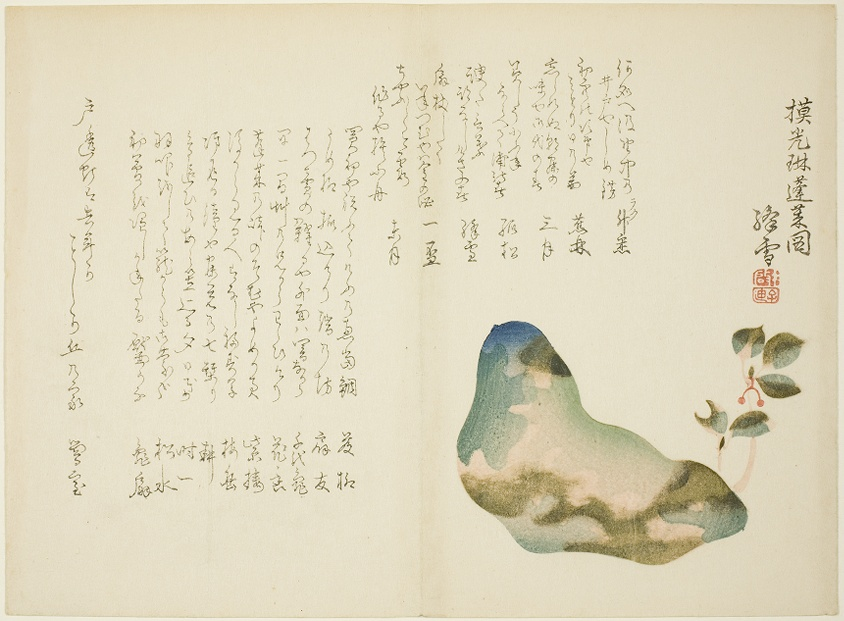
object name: Print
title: Mount Horai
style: Japanese (culture or style)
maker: Kosetsu Ogino (Japanese, active late 19th century)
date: 1860s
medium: Color woodblock print; surimono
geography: Japan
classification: woodblock print; print; asian art